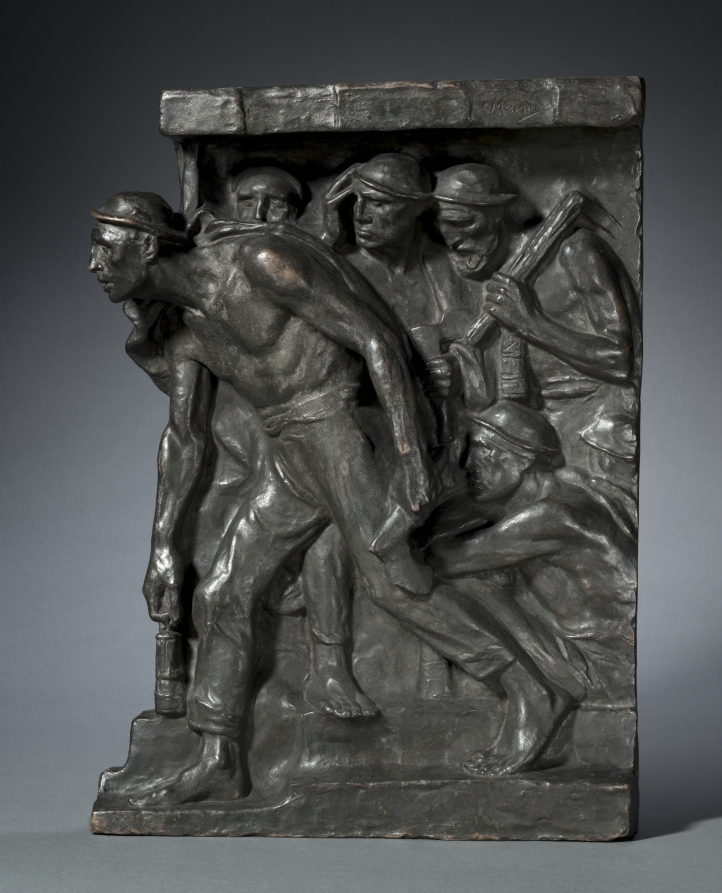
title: The Miners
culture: Belgium, 19th century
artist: Constantin Meunier (Belgian, 1831–1905)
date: c. 1890 – 1900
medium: bronze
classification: Sculpture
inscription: Signed on top: "C. Meunier"; inscribed on right side: "Atelier C. Meunier, 50 Rue (?)"